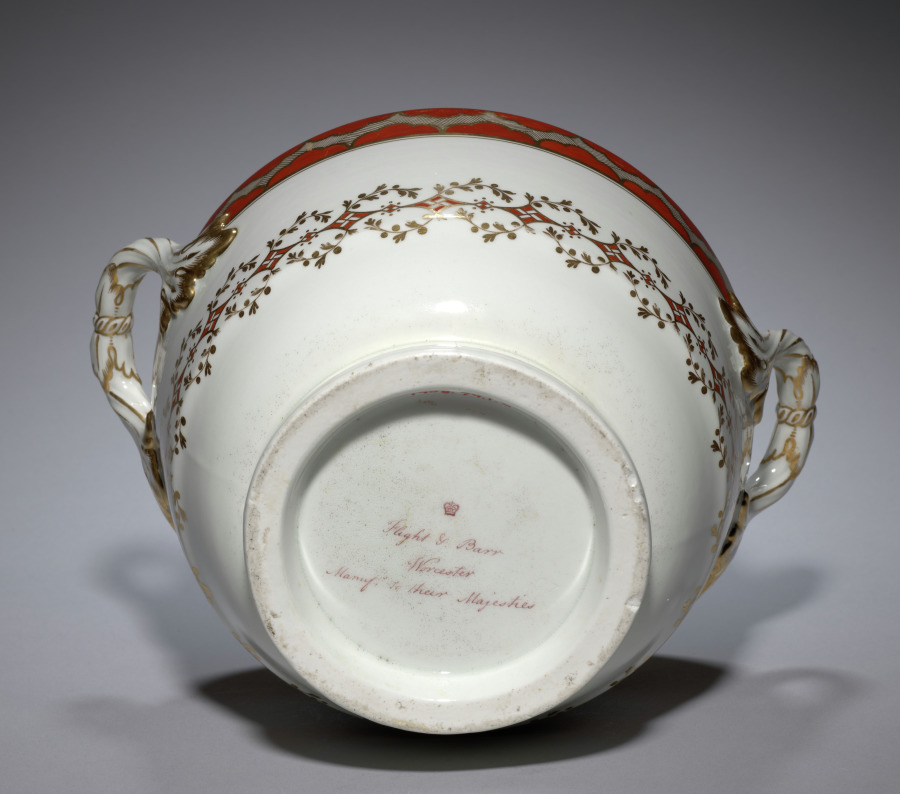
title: Ice Pail (1 of 2)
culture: England, late 18th-early 19th Century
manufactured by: Flight & Barr (British)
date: c. 1792–1804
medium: porcelain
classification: Ceramic